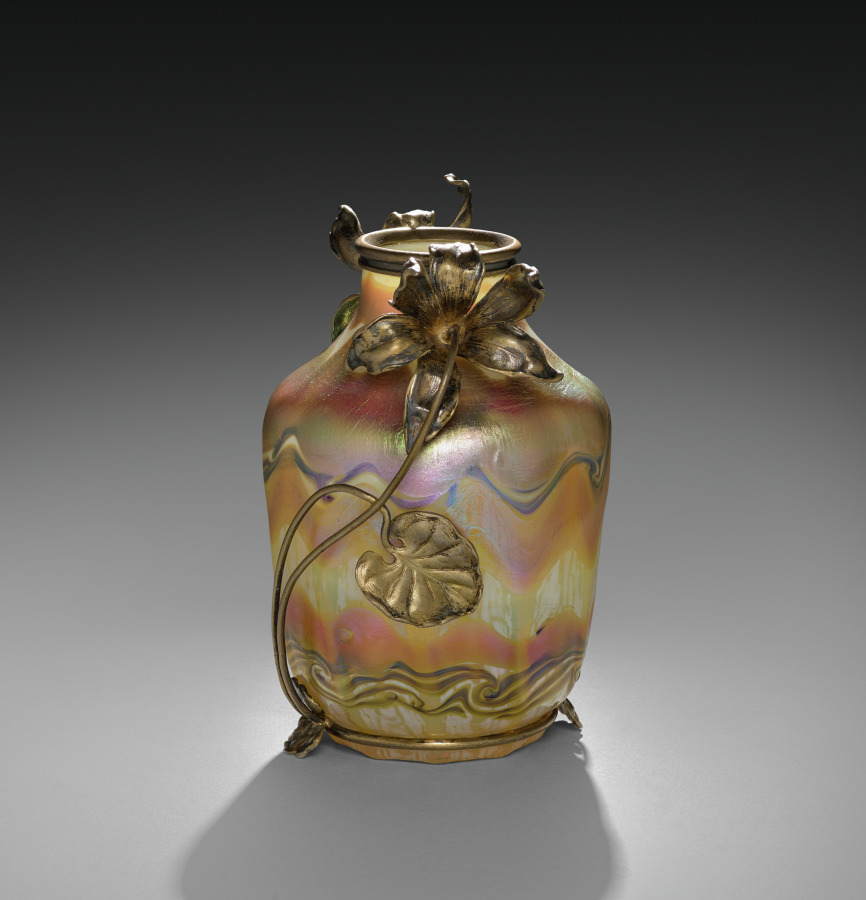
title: Vase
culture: America, New York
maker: Tiffany Glass & Decorating Company (America, New York, 1892–1902)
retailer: Siegfried Bing (German, active in France, 1838–1905)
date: c. 1900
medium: Favrile glass, silver mount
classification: Glass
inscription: Louis C. Tiffany o10301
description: This small vase is made of Louis Comfort Tiffany's signature Favrile glass. Early on when Tiffany began collaborating with glass artists on new types of production, his aesthetic ambitions were realized in the development of Favrile glass, deliberately named to sound French, expensive, and “handmade.” Largely through Tiffany's marketing ability, Favrile glass became America’s greatest contribution to the Art Nouveau style. His works were exhibited at international expositions; galleries in major European cities, where his creations were bought by many museums; and in his store in Manhattan, known as the Tiffany Glass and Decorating Co., later Tiffany Studios. Along with the many shapes and sizes of his decorative vases, Tiffany used Favrile glass in mosaic panels, stained glass windows, and his artistic line of table and floor lamps.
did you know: This vase has French mounts indicating that it was likely sold by Louis Comfort Tiffany's agent in Paris, Siegfried Bing, who helped popularize Tiffany's designs throughout Europe.